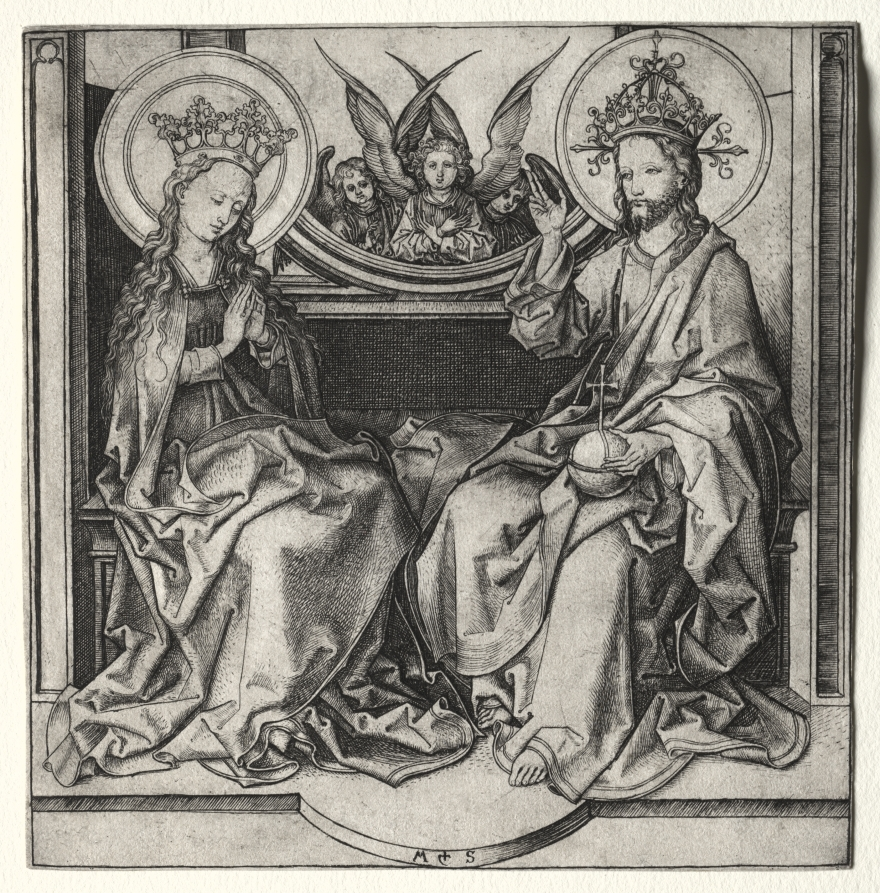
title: God the Father and the Blessed Virgin Enthroned Attended by Angels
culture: Germany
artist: Martin Schongauer (German, c. 1450–1491)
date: c. 1480–90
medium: engraving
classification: Print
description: Enthroned side by side, Christ as Savior of the World blesses his mother Mary, crowned Queen of Heaven for her divine maternity. In return, Mary bows her head in prayerful devotion, appealing for the redemption of humankind. The development of early printing methods during the 15th century offered more people personal devotional images that were previously limited to less affordable media, like paintings, sculptures, or illuminated manuscripts.